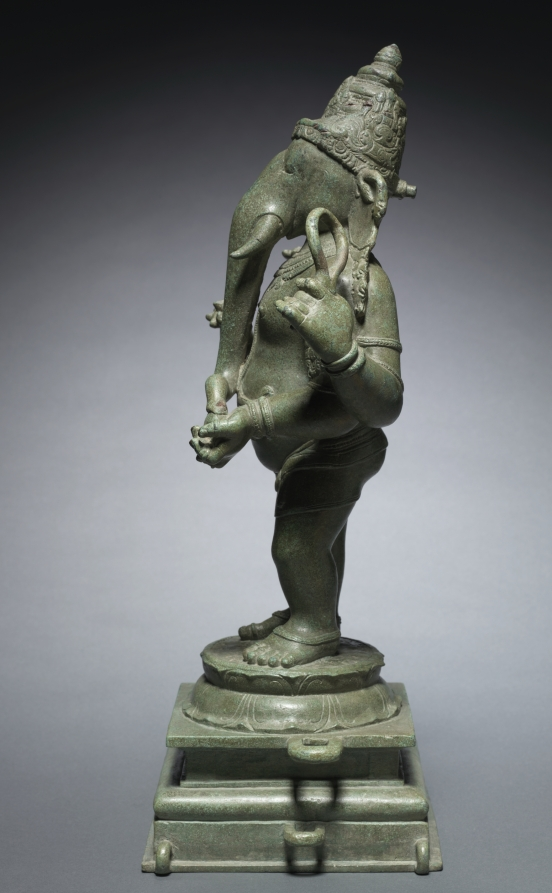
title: Ganesha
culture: South India, Medieval period, Chola dynasty(10th-13th century)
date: c. 1070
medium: bronze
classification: Sculpture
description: Ganesha, the god of wealth and abundance, is an auspicious and revered Hindu deity. He removes obstacles and protects his worshipers. Numerous myths explain how Ganesha became an elephant-man composite, but the most popular version relates the story of how he was decapitated by his enraged father, Shiva, and restored to life through the intervention of his mother, Parvati. Shiva agreed to revive him with the head of the first creature encountered: an elephant. Ganesha's strength—his profound spiritual wisdom—contrasts with his weakness for sweets, as indicated by his pudginess and the sweet modaka he carries. In Ganesha, opposing forces exist in perfect harmony.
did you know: Ganesha pulls his own broken tusk in one hand, which he used as a pen to write the epic Mahabharata.